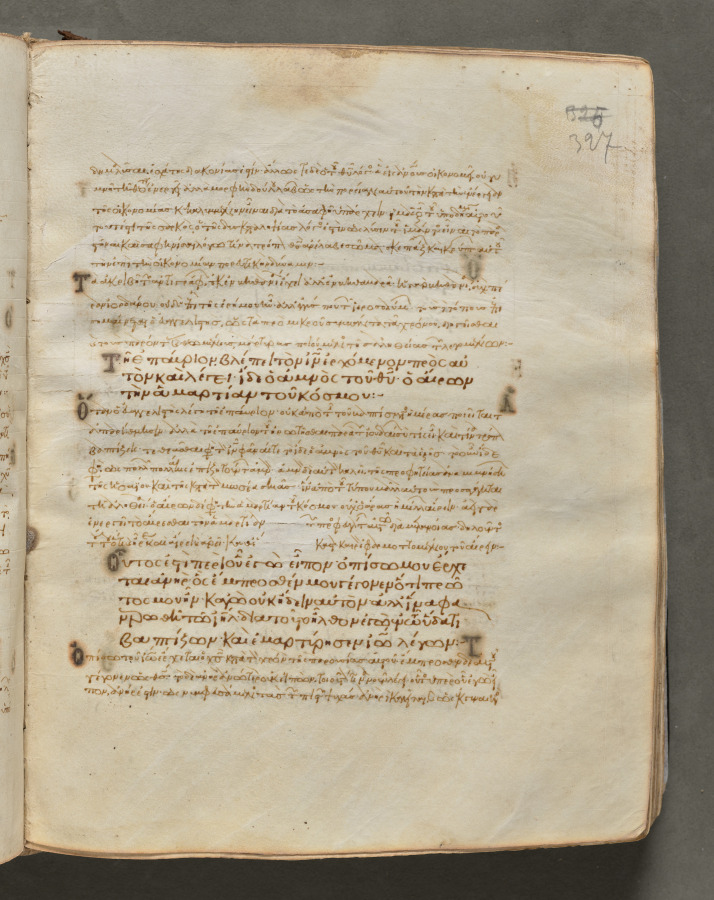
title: Text, folio 327 (recto), from a Gospel Book with Commentaries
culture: Byzantium, Constantinople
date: c. 1000–1100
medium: ink, tempera, and gold on vellum; leather binding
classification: Bound Volume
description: Each of the four gospels in this book opens on a page with brilliantly illuminated borders depicting the author of the text as well as birds—principally peacocks, symbols of the immortality of the soul—and fountains, representing the fountain of life and the salvation of the soul. This volume consists of 428 leaves with texts in Greek. Its level of sophistication suggests that it was probably written and decorated in a monastery in Constantinople.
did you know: Gospel books were carried in procession through Byzantine churches.